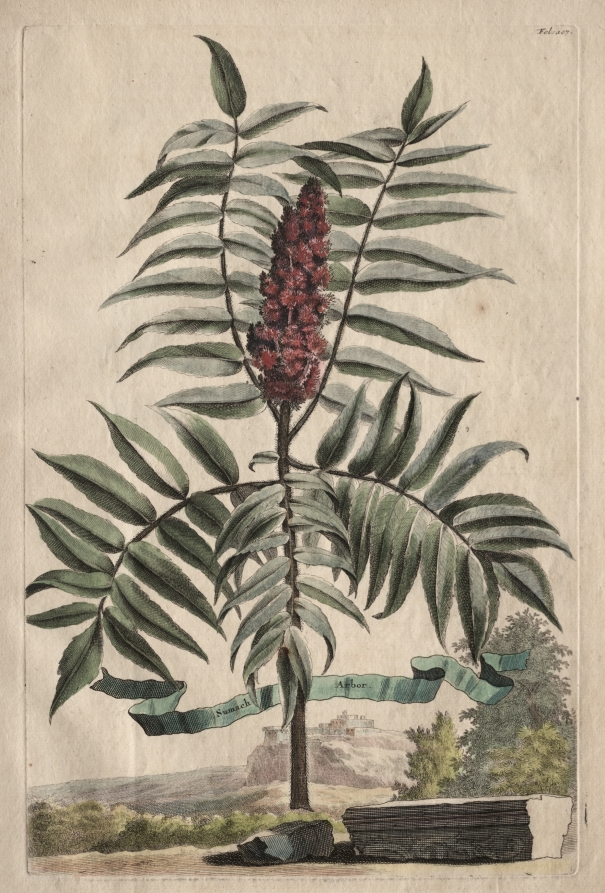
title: Phytographia Curiosa: Sumach Arbor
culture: Netherlands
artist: Abraham Munting (Dutch, 1626–1683)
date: c. 1651–83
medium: etching, hand colored with watercolor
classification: Print